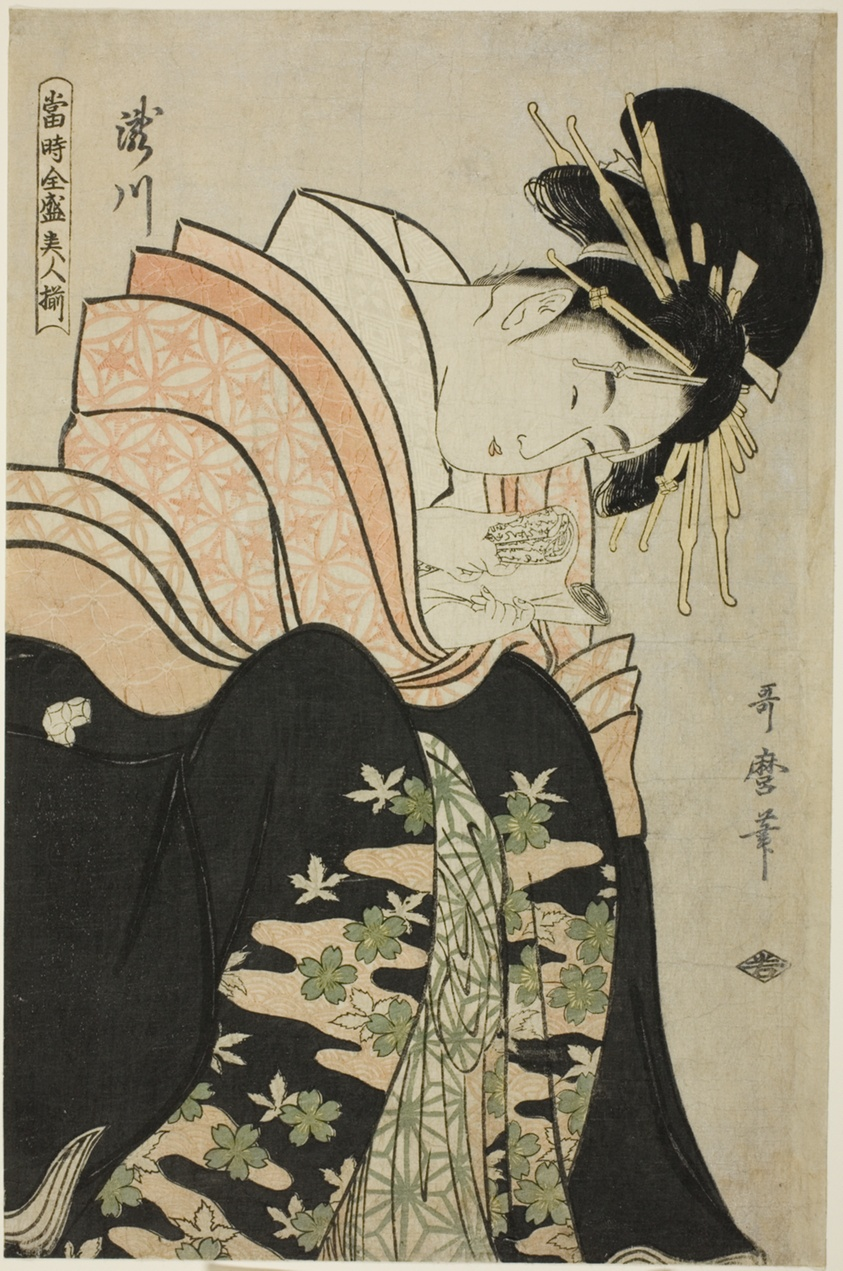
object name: Print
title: Takigawa, from the series "Array of Supreme Beauties of the Present Day (Toji zensei bijin zoroe)"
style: Japanese (culture or style)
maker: Kitagawa Utamaro 喜多川 歌麿; Japanese, 1753 (?)-1806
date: c. 1794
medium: Color woodblock print; oban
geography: Japan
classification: woodblock print; print; asian art